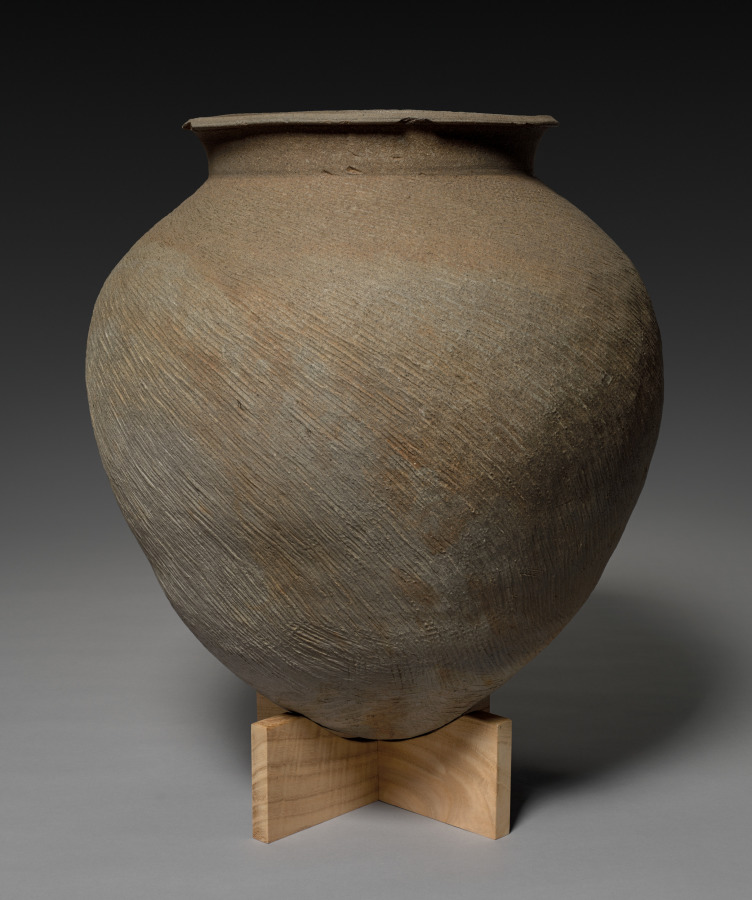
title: Wide-Mouth Jar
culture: Japan, Kamakura period (1185–1333) to Muromachi period (1392–1573)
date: 1300s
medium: Stoneware with impressed and incised decoration (Suzu ware)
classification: Ceramic